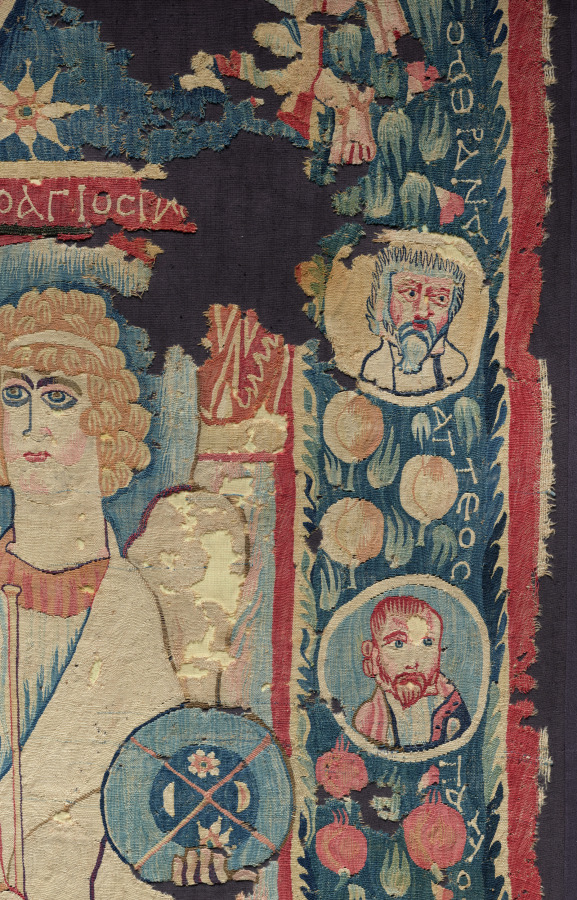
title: Icon of the Virgin and Child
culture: Egypt, Byzantine period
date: 500s CE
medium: wool and dye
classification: Textile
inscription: on the lintel of the architectural setting, the Greek inscription translates as: The Holy Michael, The Holy Mary, The Holy Gabriel. The wide foliate border is decorated with fruits and flowers and, in the lower part, with medallions containing the busts of apostles whose names are inscribed nearby in Greek and are translated as: Andrew, Matthew, Paul the Apostle, Luke, James, Phillip, Mark, Thomas, John, Matthias, Peter, and Bartholomew.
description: Woven from more than 20 colors of woolen thread, this rare tapestry was more expensive than a painting when it was made. The historical price reflected contemporary viewers’ appreciation for the skilled color blending by the weavers. Hung on a wall, this tapestry allowed viewers to venerate (honor) the Virgin Mary and the Christ Child in the Christian Orthodox church. Angels and apostles surround them, their names written in Greek. To be spiritually effective, an icon (devotional image) should follow its subject’s established visual tradition as closely as possible.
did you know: Created in Egypt's hot and dry desert climate, this tapestry features a border of lush greenery and fruits, while flowers peek out from around the throne of the Virgin. Imagine encountering this artistic oasis in a Coptic church during the dry heat of the day.